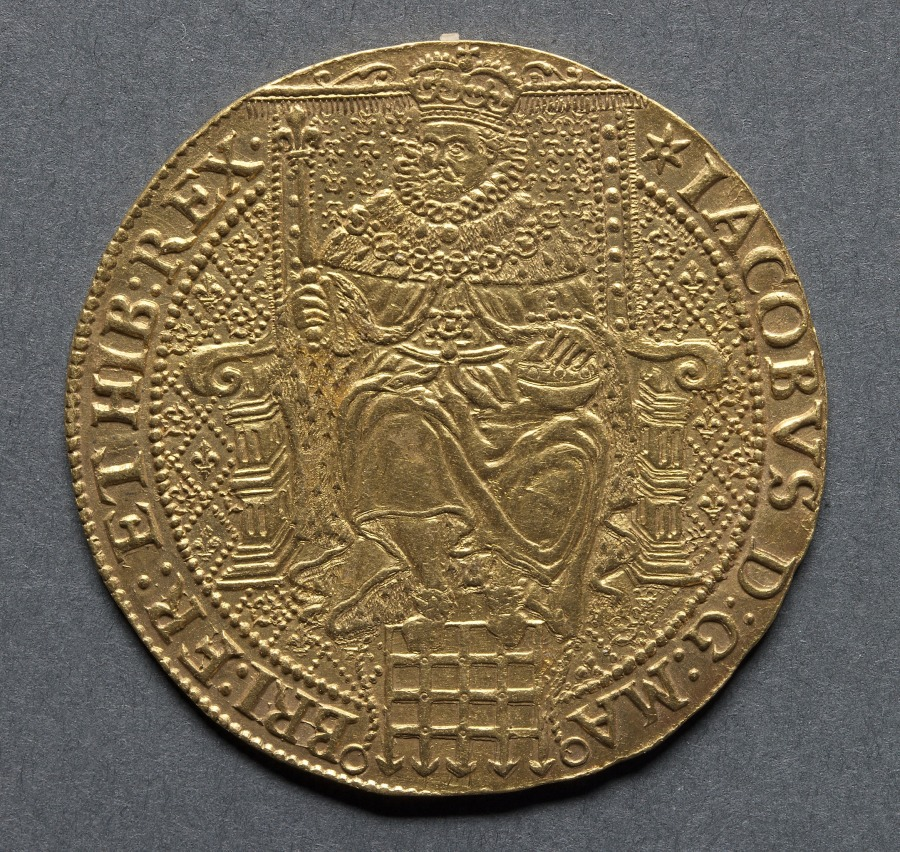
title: Rose Ryal: James I (obverse); Shield of Arms (reverse)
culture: England, James I, 1603-1625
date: 1619–20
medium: gold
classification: Coins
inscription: IACOBUS DG MA BRI FR ET HI REX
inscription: A. DNO FACTUM EST ISTUD ET EST MIRAB IN OCULIS NRIS, XXX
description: This gold coin comes from the third period (1619–25) of coinage of King James I of England and features a crowned shield surrounded by roses and lions on the reverse. This is the last medieval design of the king enthroned, an excellent example of the fine designs that the ancient craftsmen managed to produce on hand-struck hammered coins.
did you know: A rose ryal is worth 30 shillings; you can see a roman numeral 30 on the reverse.